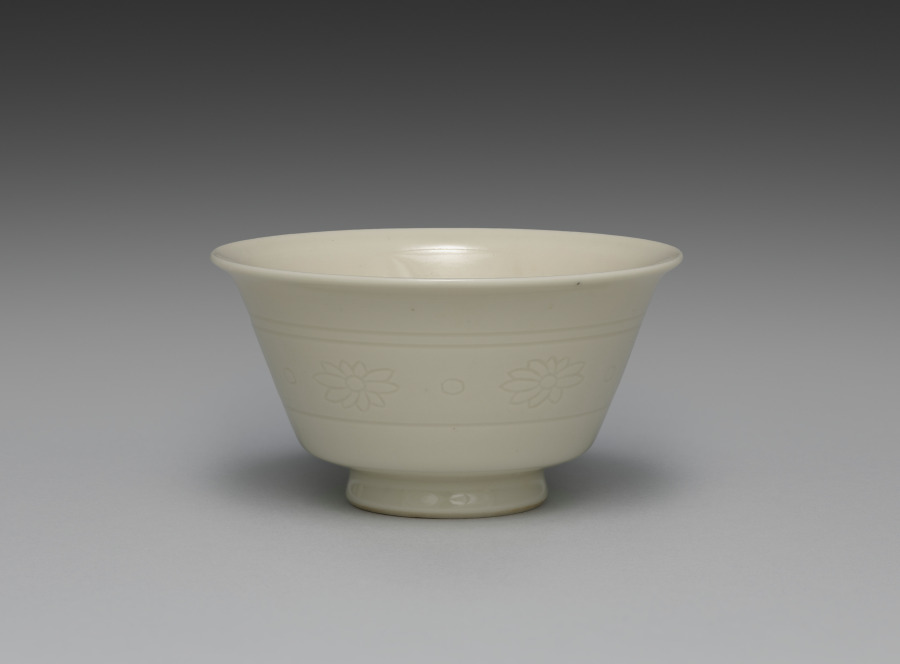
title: Teacup from Teacups with Floral Band Motif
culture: Japan, Meiji period (1868–1912)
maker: Seifū Yohei III (Japanese, 1851–1914)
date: 1893–1914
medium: One from a set of five cups; porcelain with incised decoration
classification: Ceramic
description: The five sencha teacups in this set are decorated with incised flowers and dots between a double band at the top and a single band at the bottom. They are in Yohei III’s creamy taihakuji body and glaze. In their motifs, they are quite similar to an incense burner by Yohei III (see CMA 2022.180), but the flowers are even more simple in design, with no open circle at the center. A label affixed to the side of the box refers to them as “sencha cups in emulation of Korean white [ware].” The reference to Korean ware indicates that even though Yohei was more directly inspired by Qing-dynasty wares from the Dehua kilns in Fujian Province in developing his porcelain clay and glaze for works such as these, the general understanding of the continental models still placed them, at least in terms of color, among pieces broadly associated in Japan with Korean white wares. The delicate cups are thinly potted, so they have a highly desirable translucency.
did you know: The delicate cups in this set are thinly potted, so they have a highly desirable translucency.